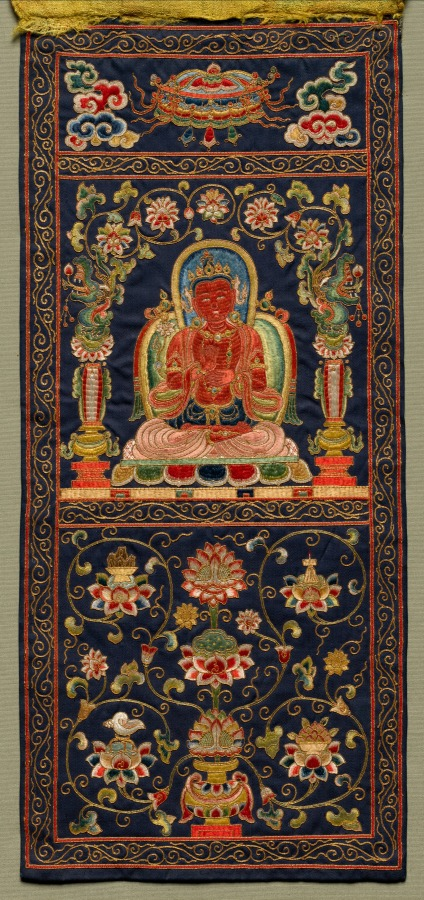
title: Thangka with the Seventh Bodhisattva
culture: China, Ming dynasty (1368–1644)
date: 1368–1424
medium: Silk and gold thread on silk satin ground, embroidery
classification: Embroidery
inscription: Penned on the reverse is a Tibetan inscription that translates as "the Seventh Bodhisattva."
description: In remarkably pristine condition, this embroidery is from a dispersed set that included images of protectors and bodhisattvas. The embroidery technique and pictorial style are Chinese, but the subject matter and the type of devotional hanging called a thangka are associated with Tibetan Buddhism. Historical records state that during the early Ming dynasty (1368–1644), gifts of Buddhist art were sent from China to Tibet, since relationships between Chinese rulers and Tibetan monastic patriarchs were strong and amicable during this time. A Tibetan inscription on the back notes that this figure is the “seventh bodhisattva,” indicating the position in which it would have hung in a temple hall. Odd-numbered works were hung on one side of the main image, and even-numbered works on the other, counting from the center.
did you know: The bodhisattva is flanked by two columns, each topped with a makara, a fanciful water creature whose tail becomes lotus scrolls forming an arch over the bodhisattva.